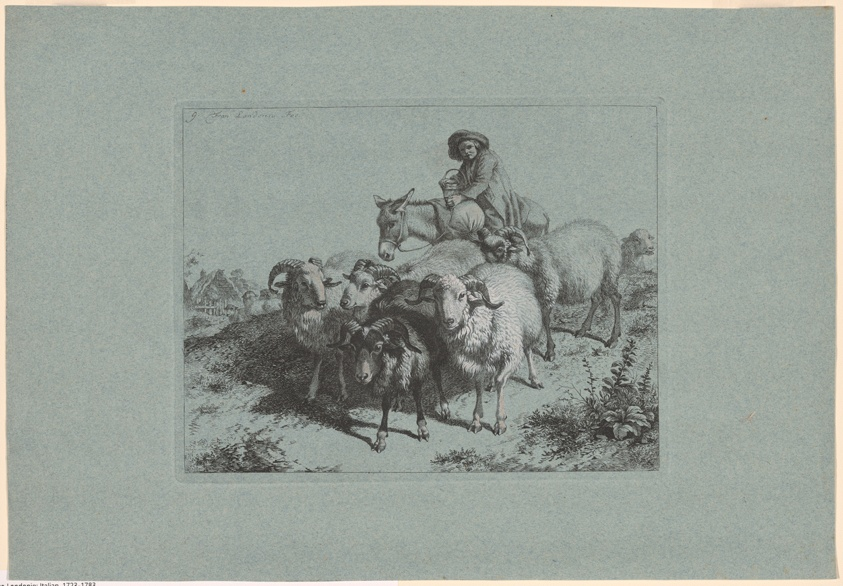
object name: Print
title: Plate 9, from The Set of 12 Pastorals Scenes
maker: Francesco Londonio (Italian, 1723-1783)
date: 1762-63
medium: Etching in black, with white opaque watercolor on blue wove paper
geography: Italy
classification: etching; paper; print; prints and drawing